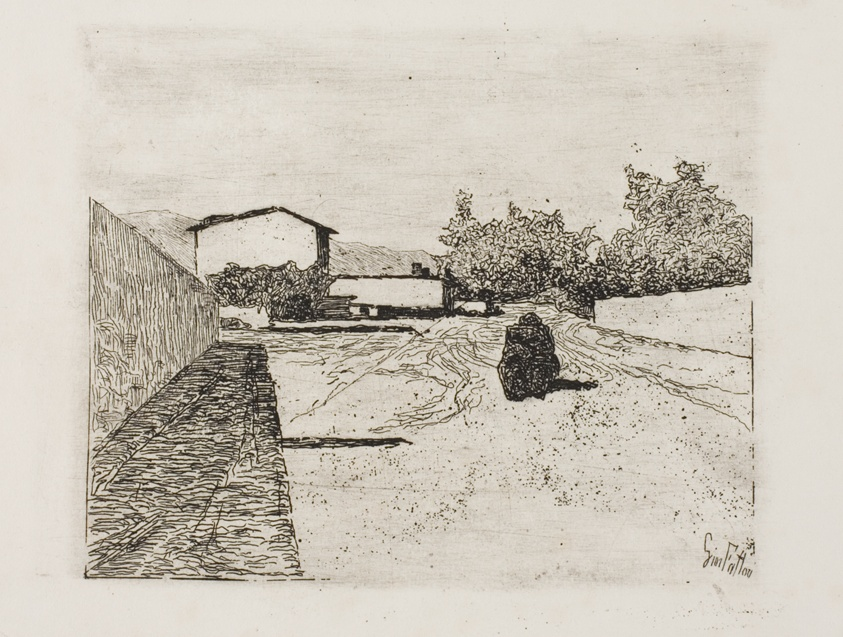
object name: Print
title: A Street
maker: Giovanni Fattori (Italian, 1825-1908)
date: c. 1888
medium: Etching with drypoint on ivory wove paper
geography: Italy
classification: etching; paper; print; prints and drawing